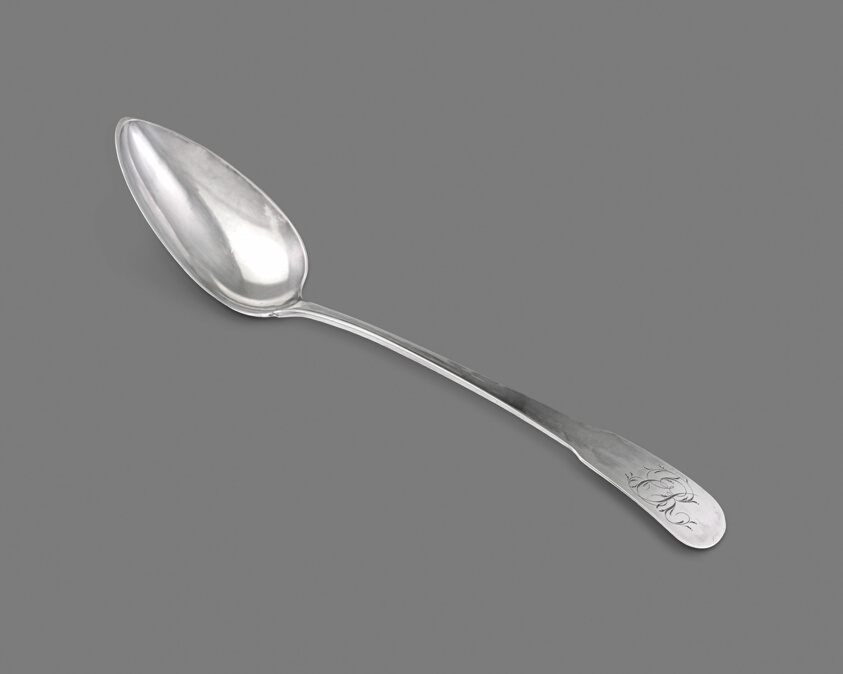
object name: Metalwork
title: Tablespoon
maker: Robert Wilson; American, 1796–1846; Active New York City 1803–1811; Active Philadelphia 1816–1846; Philadelphia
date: c. 1810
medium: Silver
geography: United States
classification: spoon; silver; utensil; american decorative arts; american arts; decorative arts